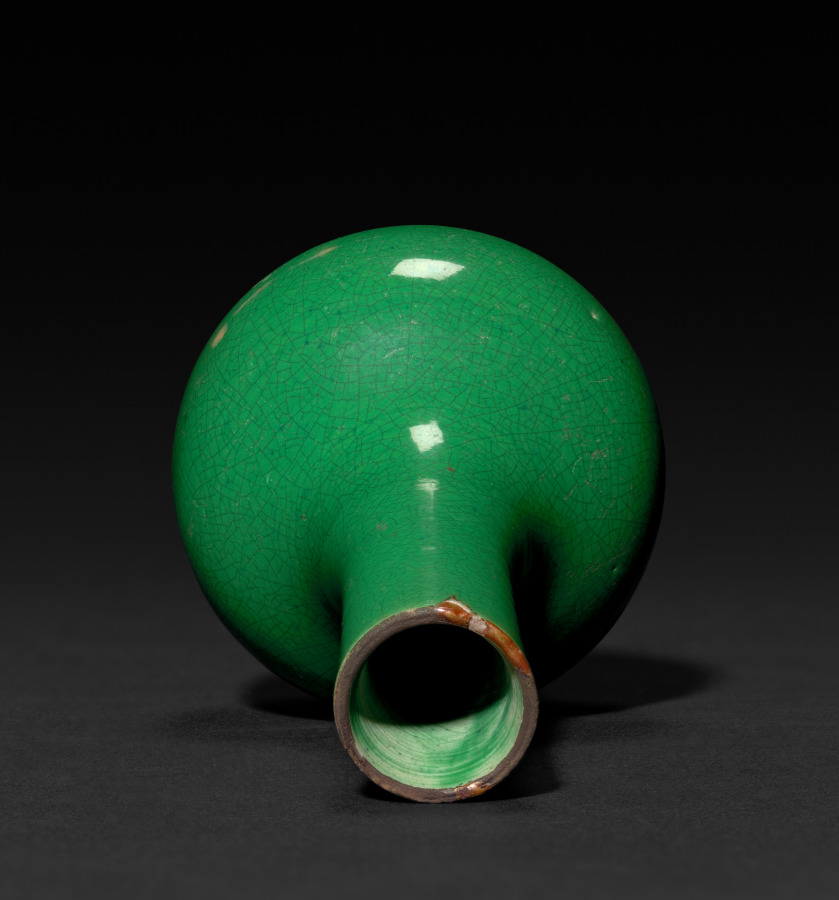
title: Bottle-Shaped Vase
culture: China, Qing dynasty (1644–1911), Qianlong reign (1736–95)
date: 1736–95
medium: porcelain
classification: Ceramic